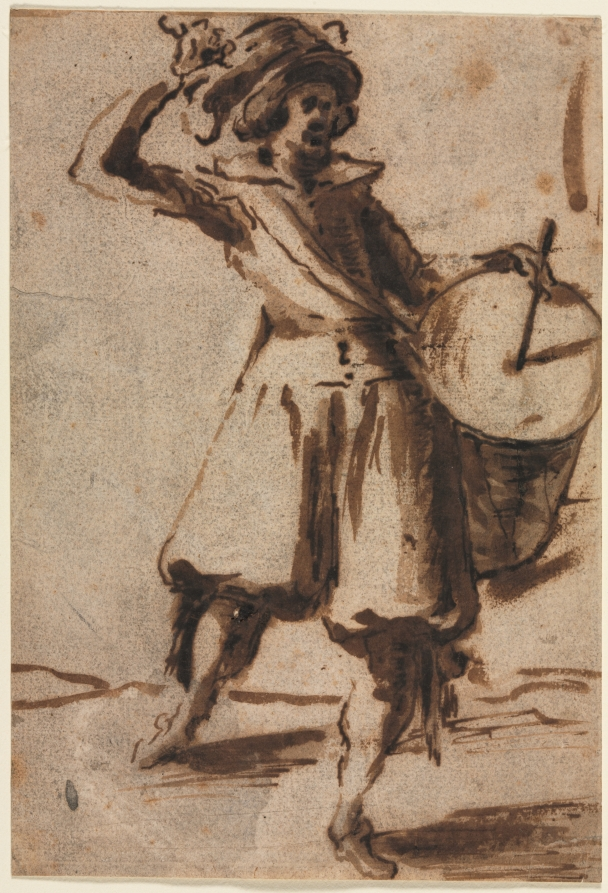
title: The Drummer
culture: France, 17th century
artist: manner of Jacques Callot (French, 1592–1635)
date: 17th century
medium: pen and brown ink and brush and brown wash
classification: Drawing